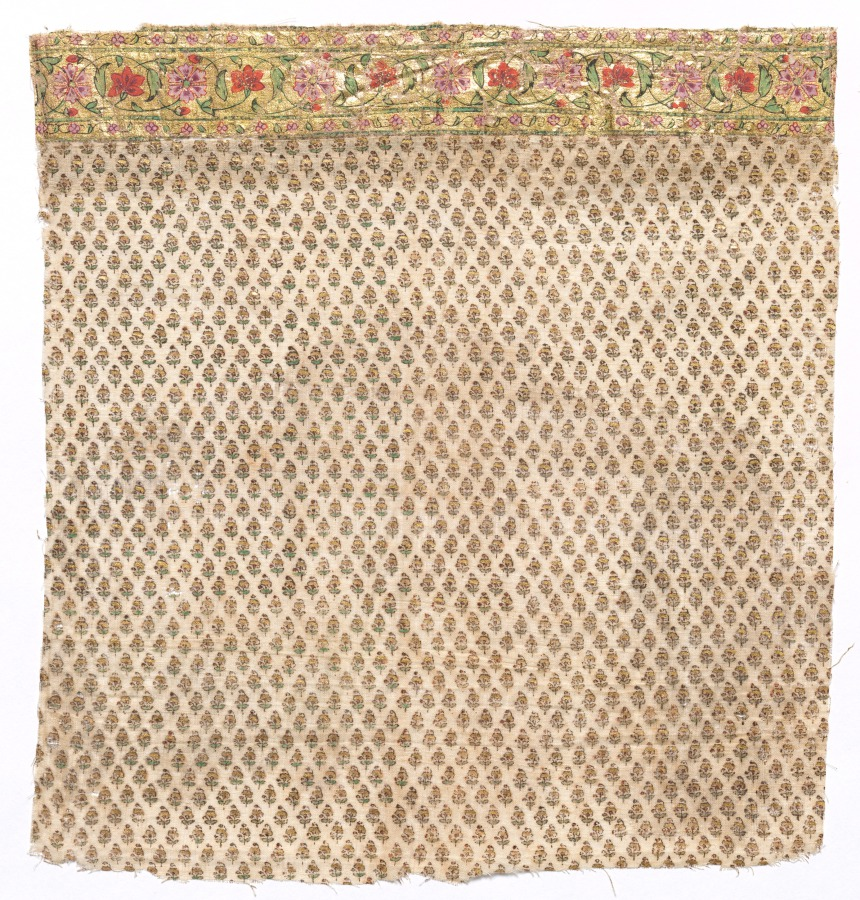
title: Fragment of Draped Apparel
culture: India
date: late 1700s or early 1800s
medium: Block printed and overprinted with gold leaf (varak) and overpainted with pigments on undyed plain weave cotton muslin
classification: Textile